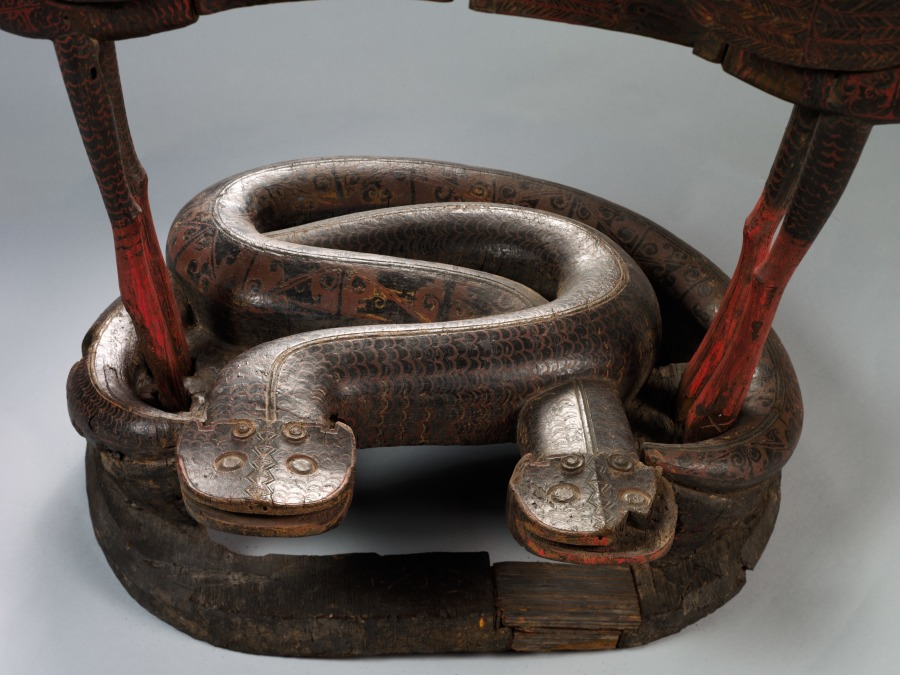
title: Cranes and Serpents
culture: China, reportedly from Hunan province, Changsha, Warring States period (475–221 BCE), State of Chu (c. 1046–223 BCE)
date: 475–221 BCE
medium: lacquered wood with polychromy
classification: Sculpture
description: A different style of ritual art developed in the state of Chu in South China. In addition to bronze vessels, lacquered wood artifacts expanded the repertory of ritual implements. This extraordinary sculpture was probably a drum stand for supporting a suspended drum in ritual ceremonies. It is unique among other excavated drum stands of the Chu, which typically show two birds standing on tigers. The theme of the bird stepping on the serpent was common in the Chu visual culture. Yet the slender proportions and seemingly flimsy structure of this particular set raise the question of whether it was utilitarian or mostly served symbolic functions in the tomb. The birds' and serpents' bodies have designs painted in red lacquer and yellow pigment against the black lacquer. Scientific analyses confirm the additional use of a blue or green pigment that has been discolored over time.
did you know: The cranes' long necks allowed a lightweight drum to be suspended from strings through the beaks, while the densely intertwined snakes provided a weighty base to stabilize the object during musical performances.